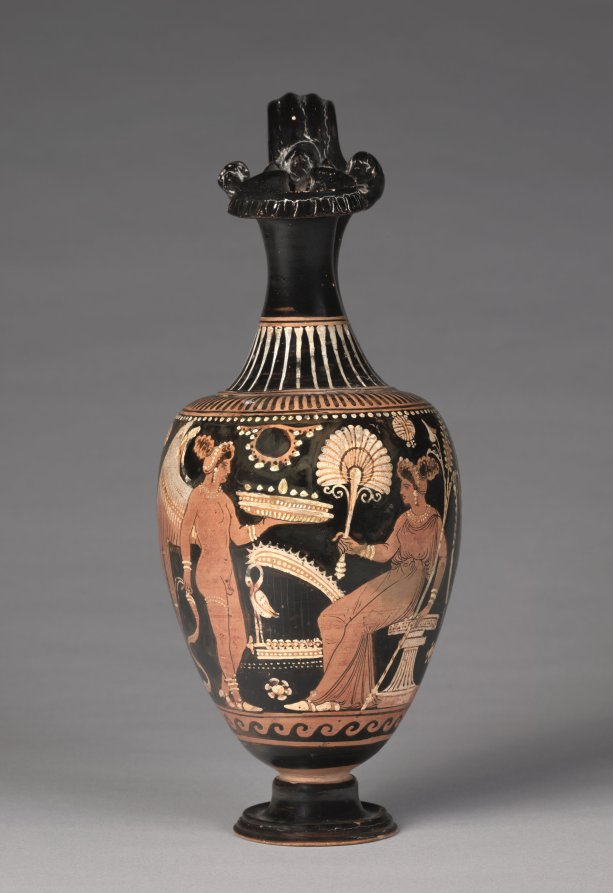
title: Red-Figure Oinochoe (Wine Jug): Eros and Woman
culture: South Italian, Apulian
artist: attributed to Cleveland Group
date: c. 340–320 BCE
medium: ceramic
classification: Ceramic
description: This wine jug provides the name for the Cleveland Group, comprising more than 20 similar vases decorated in the "Ornate" style of Apulian red-figure pottery. Close in style to the better known Darius Painter and the Patera and Ganymede Painters, many Cleveland Group vases feature very effeminate Eros figures like this one, here holding two phialai (libation bowls) and facing a woman before a harp.